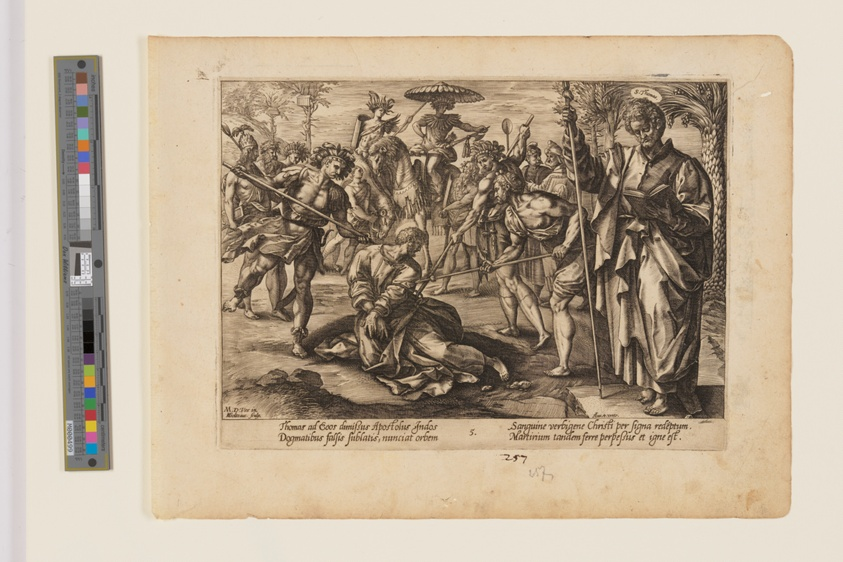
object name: Print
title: The Martyrdom of St Thomas, from The Martyrdom of Christ and the Apostles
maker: Hendrick Goltzius (Dutch, 1558–1617); after Maarten de Vos (Flemish, 1532–1603); published Hieronymus Cock (Netherlandish, c. 1510–1570)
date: c. 1578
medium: Engraving on ivory laid paper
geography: Netherlands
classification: engraving; paper; print; prints and drawing